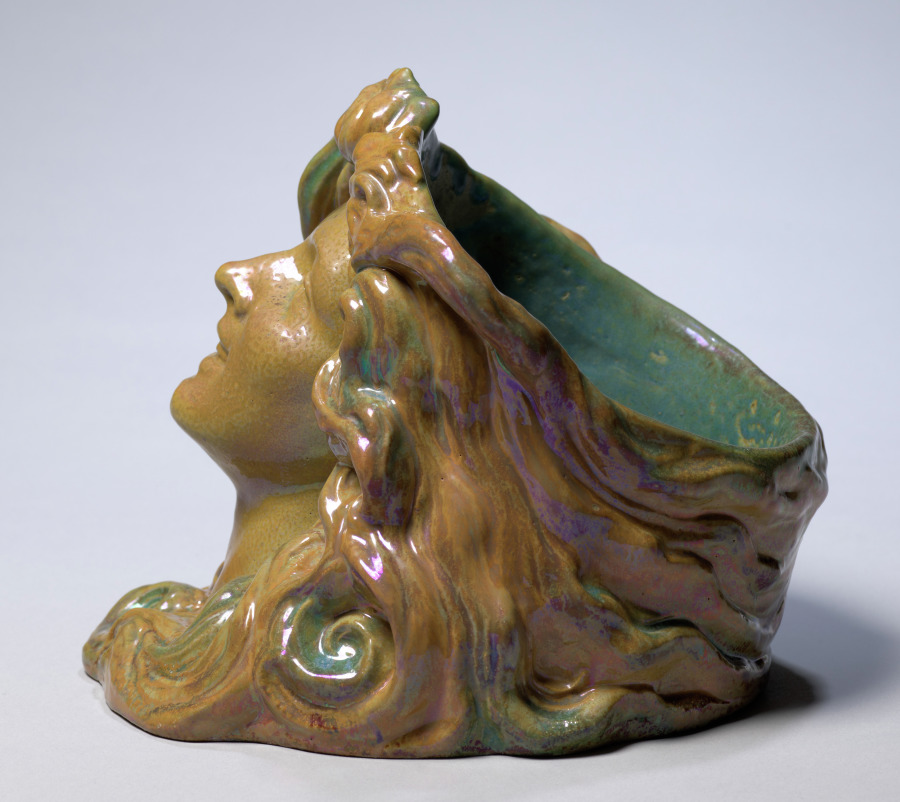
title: Vase in the Form of a Woman's Head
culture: France, late 19th Century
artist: Emile Muller (French, 1889)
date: c. 1895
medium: stoneware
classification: Ceramic